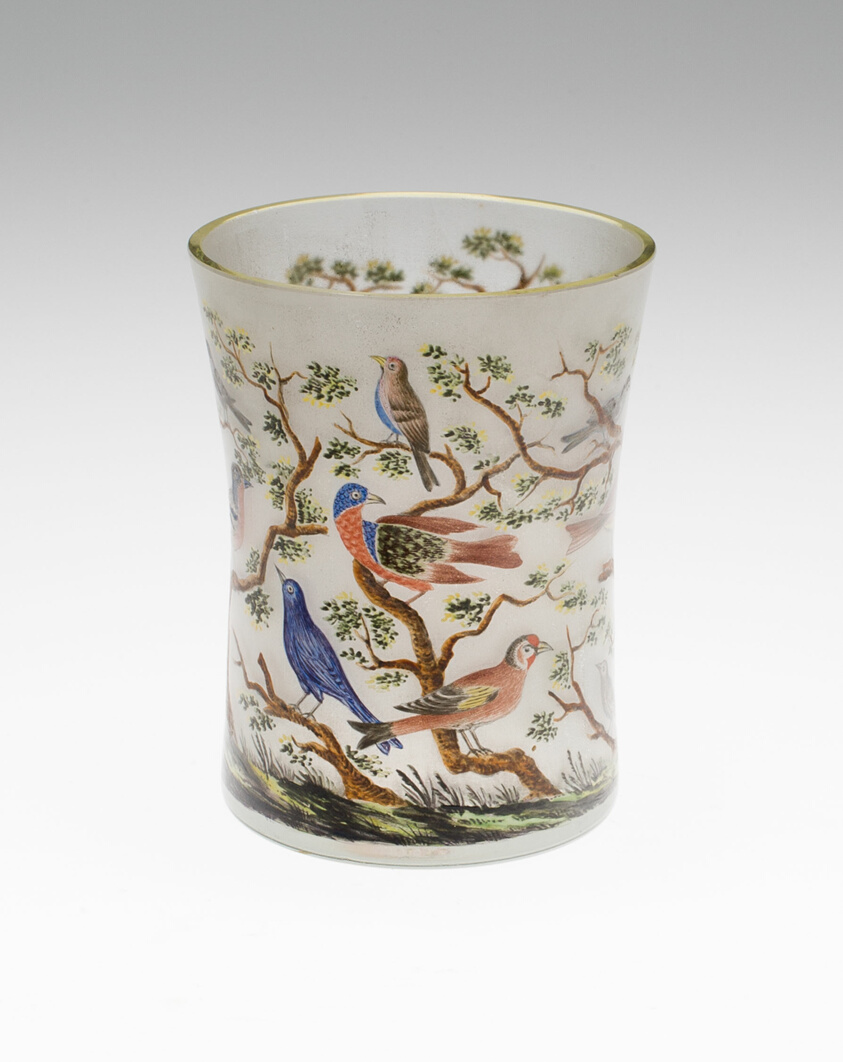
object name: Glass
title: Beaker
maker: Germany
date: c. 1830 or later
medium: Glass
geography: Germany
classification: drinking vessel; glass; european decorative arts